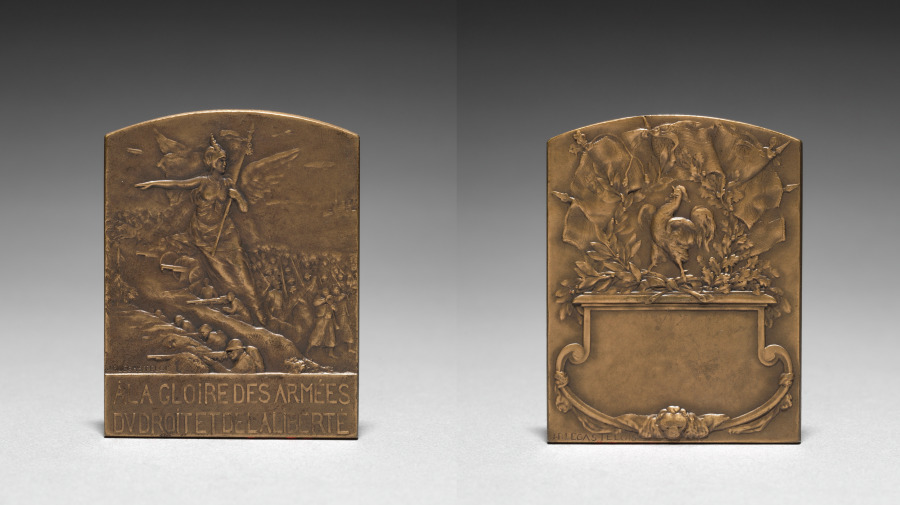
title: Medallion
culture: France, 19th-20th century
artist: Jules Prosper Legastelois (French, 1855–1931)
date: 19117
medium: bronze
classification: Metalwork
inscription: "À la gloire des armées du droit et de la liberté."